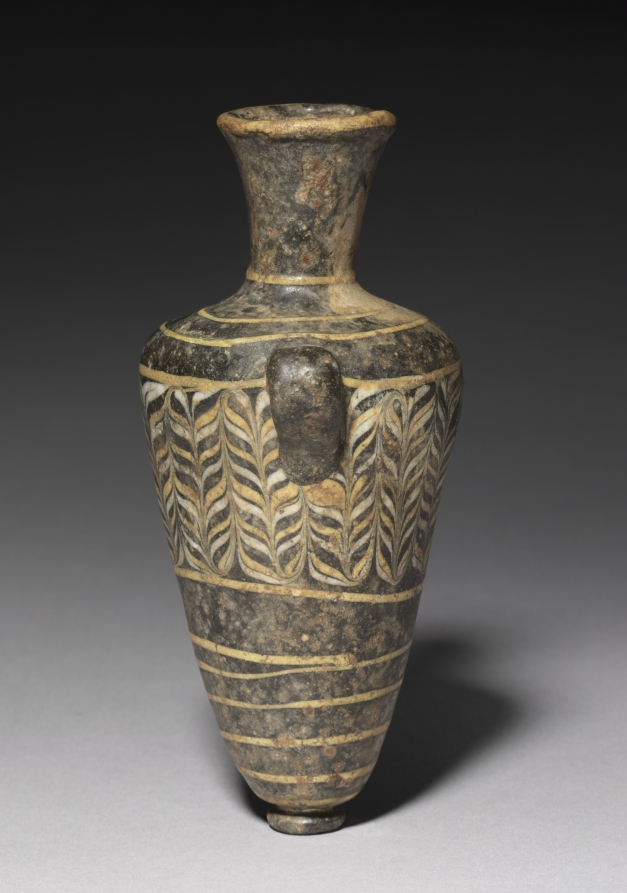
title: Unguent Bottle (Amphoriskos)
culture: Egypt, New Kingdom (1540–1069 BCE), Dynasties 18–19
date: 1549–1296 BCE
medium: glass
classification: Vessels